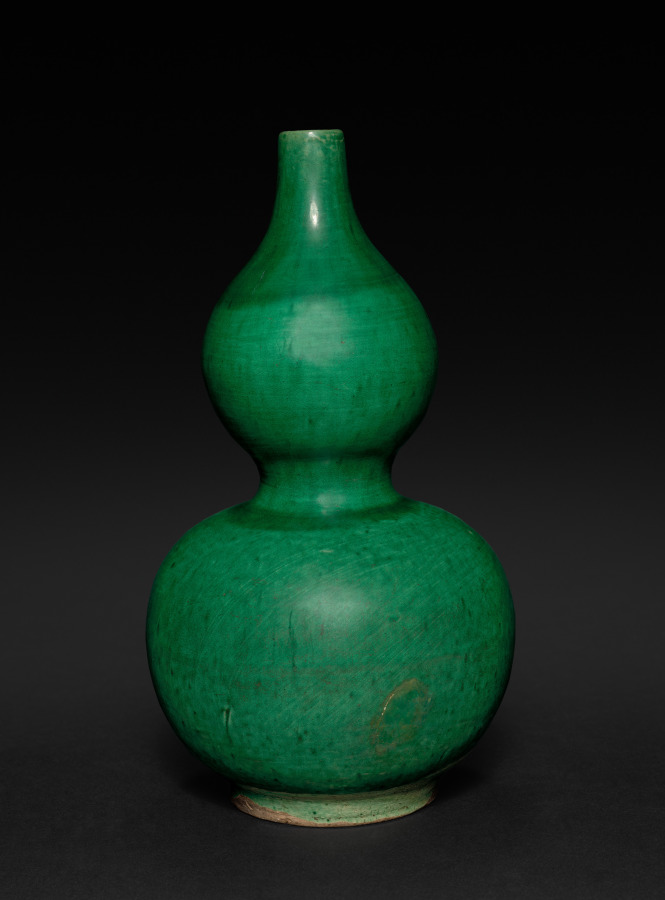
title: Double Gourd-shaped Green Vase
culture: China, Ming dynasty (1368–1644)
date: 1368–1644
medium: stoneware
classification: Ceramic